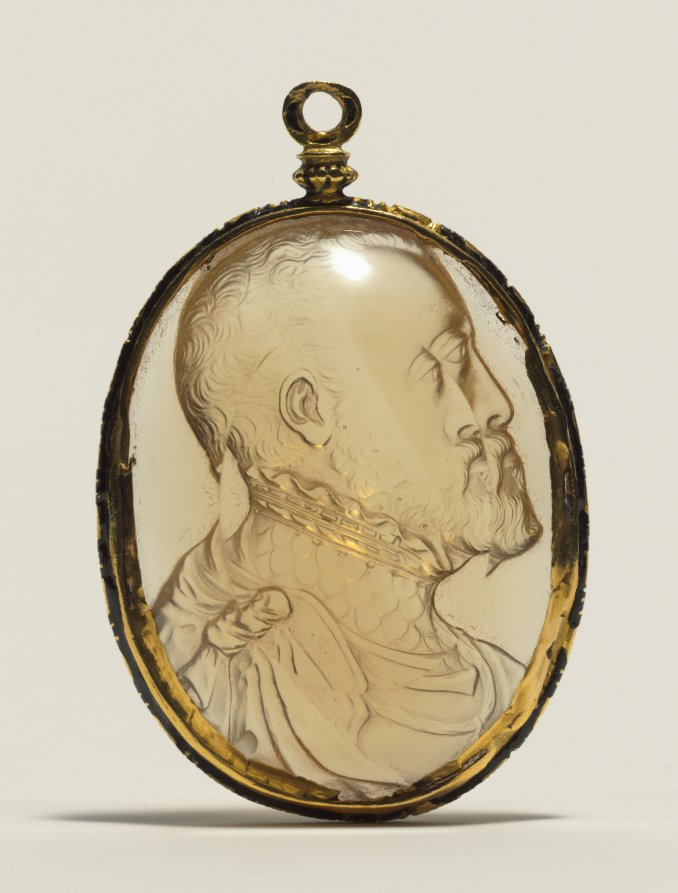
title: Portrait of Philip II, King of Spain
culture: Italy, 16th century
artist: Alessandro Cesati (Italian, before 1538-after 1564)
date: mid-1550s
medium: citrine, mounted in a gold and enamel pendant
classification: Sculpture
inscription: Signed on collar .A.E. (Likely abbreviation for “ΑΛΕΞΑΝΔΡΟΣ ΕΠΟΙΕΙ”, or “Alexandros Epoiei,” which translates to “Alexander made [me / this].”)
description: Clad in armor, Philip II wears a chain with the Order of Golden Fleece around his neck. The remarkably precise and varied cutting describes the textures of cloth, metal, skin, and hair while presenting the king’s features with striking naturalism—complete with receding hairline and prominent chin—as well as conveying his forceful character. Carved gems were luxury arts of the highest order in the Renaissance, hotly collected and used as diplomatic gifts. The original patron is not yet known, but cameos played a prominent role at the Spanish court, where the royal family often hold gems of Philip II in their portraits. The yellow quartz, rare in the 1500s, probably came from a newly opened source in South America; this object is thus both a natural marvel and a masterful portrait. One of only three known works signed by the artist (his initials appear at miniscule scale on the collar just below the knot of cloth), this stone is also likely in its original setting.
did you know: The ancient Romans believed citrine, a type of quartz, offered protection against evil thoughts.